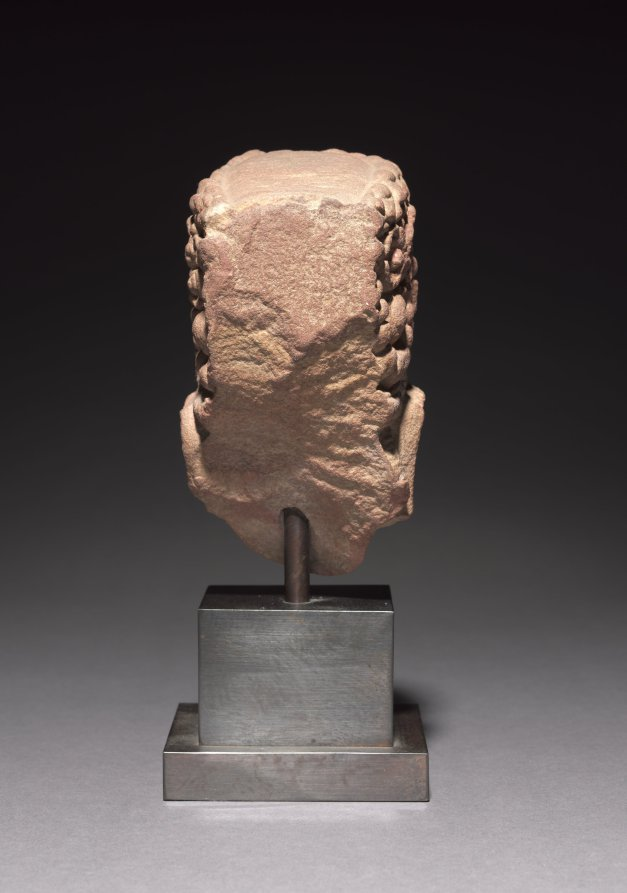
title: Head of Surya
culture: India, Mathura, Post-Gupta period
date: c. 500s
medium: spotted red sandstone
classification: Sculpture